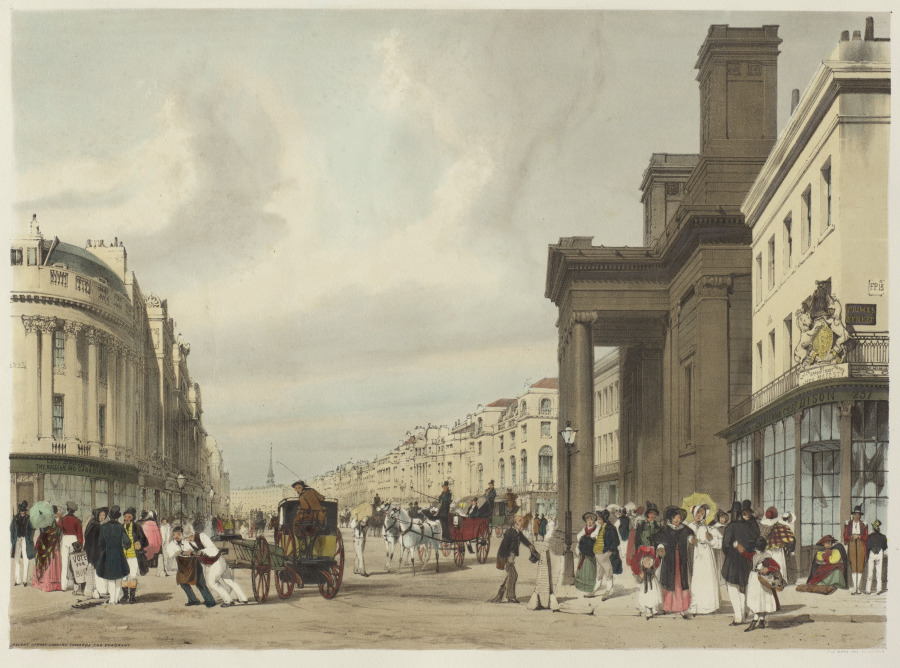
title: London As It Is: Regent Street, looking towards the Quadrant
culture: England, 19th century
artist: Thomas Shotter Boys (British, 1803–1874)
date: 1842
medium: lithograph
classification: Bound Volume